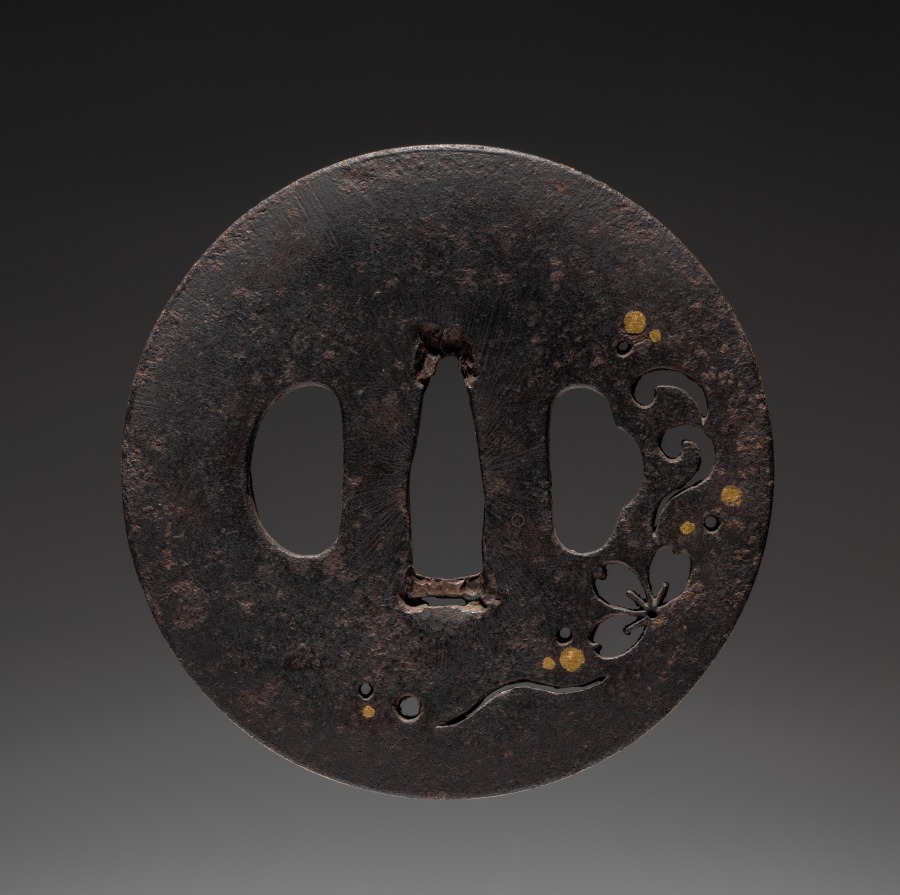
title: Sword Guard (Tsuba)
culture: Japan, possibly Edo period (1615-1868)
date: c. 1615–1868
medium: iron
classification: Arms and Armor